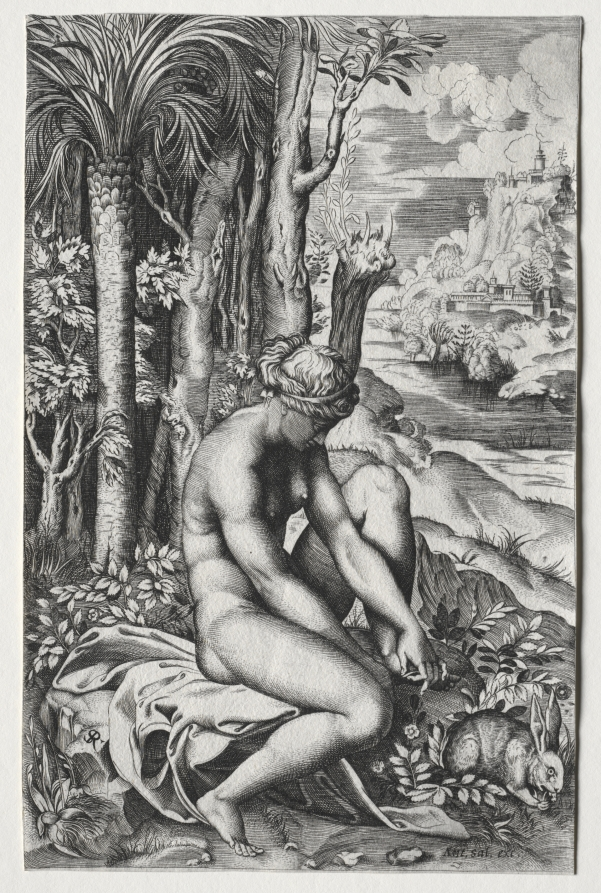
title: Venus Wounded by a Rose's Thorn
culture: Italy, 16th century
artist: Marco Dente (Italian, c. 1486–1527)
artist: after Raphael (Italian, 1483–1520)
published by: Antonio Salamanca (c.1500–1562)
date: c. 1516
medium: engraving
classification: Print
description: This composition alludes to The Lament for Adonis by the Greek poet Bion (active about 100 BCE). In the poem, Venus, distraught by the death of her lover Adonis, wanders barefoot in the woods and is wounded by brambles. Although Bion implores Venus to “weep no longer in the thickets,” the poem does not describe the moment depicted here when she plucks a thorn from her foot, imaginatively conceived as a vehicle to present a classical female nude. The wide-eyed hare near Venus is an ancient symbol of fertility and sexual desire.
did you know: The story featured here has been used to explain why some roses are red: they were stained with the blood of Venus after she pricked herself while walking in the forest.